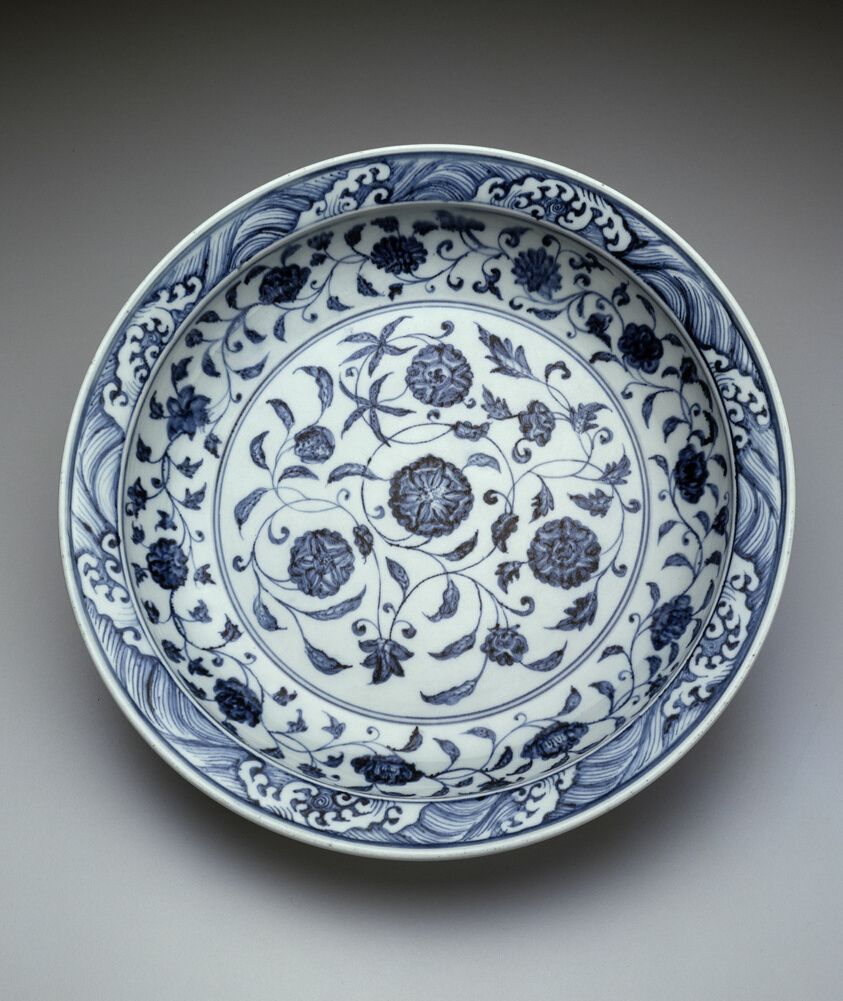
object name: Decorative Arts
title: Dish with Scrolling Flowers and Breaking Waves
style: Chinese (culture or style)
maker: China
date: Ming dynasty (1368–1644), early 15th century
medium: Porcelain painted in underglaze blue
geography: China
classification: dish (vessel); porcelain; ceramics; asian art; decorative arts